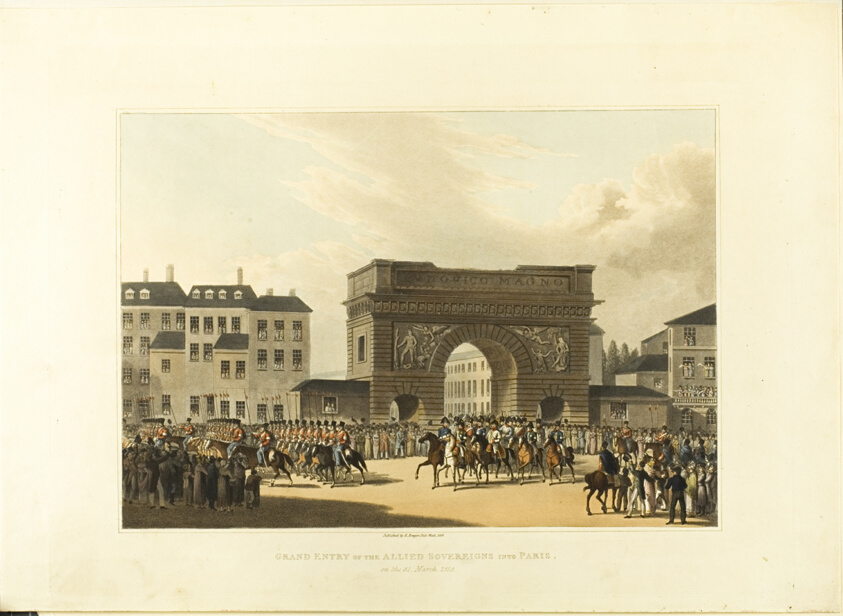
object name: Print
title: Grand Entry of the Allied Sovereigns Into Paris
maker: Unknown Artist; published by Robert Bowyer (English, 1758-1834)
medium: Handcolored aquatint on paper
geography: England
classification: aquatint; print; prints and drawing